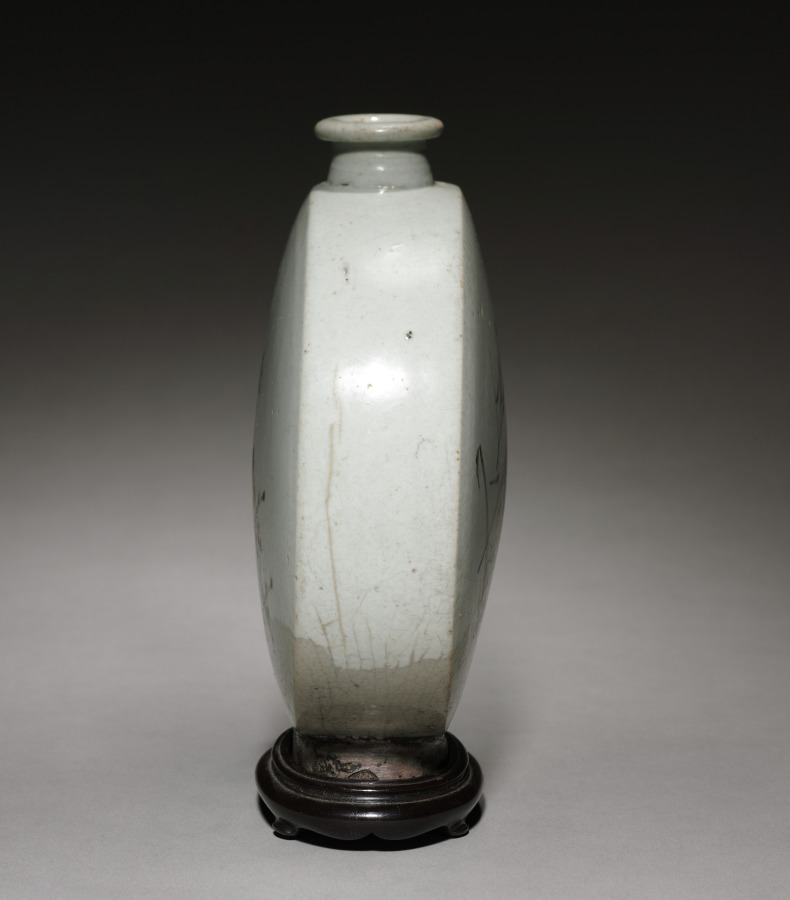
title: Wine Flask with Plum and Bamboo Design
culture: Korea, Joseon dynasty (1392–1910)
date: 1600s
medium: glazed porcelain with underglazed iron design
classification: Ceramic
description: This Korean wine flask embodies Lin Bu’s poetic line "Plums’ subtle scent pervades the moonlit dusk": its circular shape alludes to the full moon, and the gray color unintentionally spread on the flask’s lower part suggests the permeating scent of plum. The other side of the flask features a bamboo design. The plum and bamboo derive from the motif of the Four Gentlemen, which compares four plants to Confucian scholarjunzi, or "gentlemen."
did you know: The shape of this bottle can be traced all the way back to an ancient Persian pilgrim’s flask.